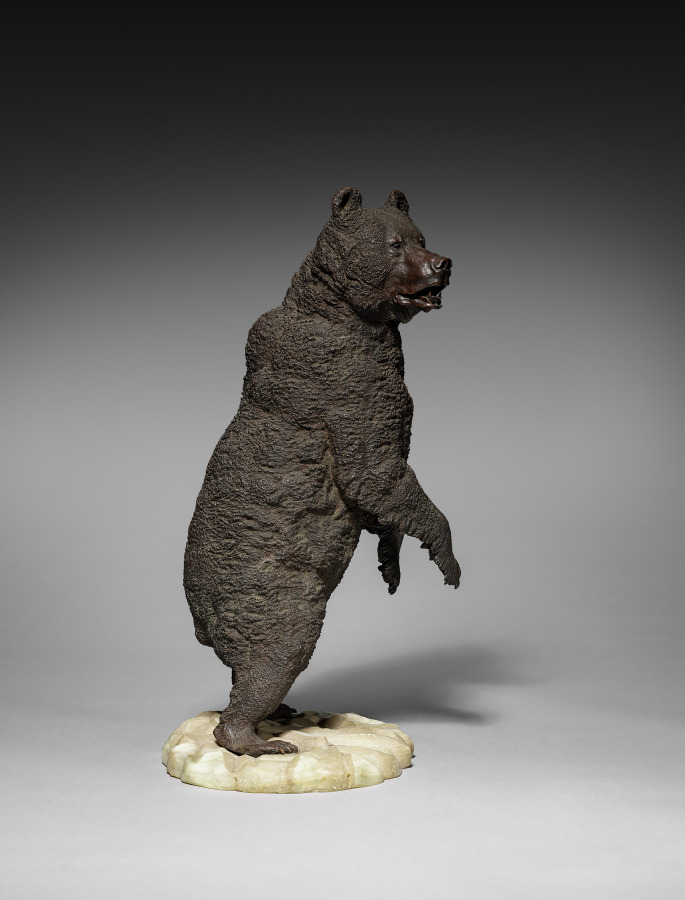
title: Bear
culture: Japan, Meiji period (1868–1912) to Shōwa period (1926–89)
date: c. 1900–1947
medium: bronze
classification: Sculpture